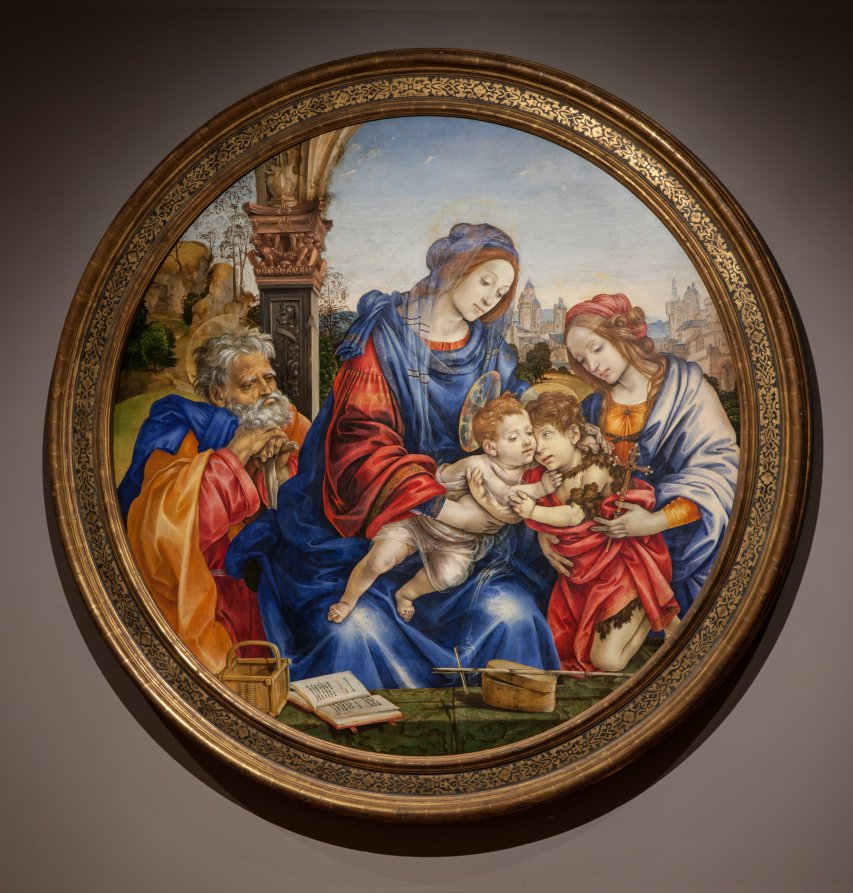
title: The Holy Family with Saint John the Baptist and Saint Margaret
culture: Italy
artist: Filippino Lippi (Italian, c. 1457–1504)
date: c. 1488–93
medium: tempera and oil on wood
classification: Painting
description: This monumental tondo, among Filippino’s most significant works, was commissioned by Neapolitan cardinal Oliviero Carafa, a leading political and ecclesiastical figure. The painter’s ingenious composition harmoniously overlaps five brilliantly colored divine figures within the challenging circular format. Behind a low wall adorned with sacred and domestic objects, Joseph observes the intertwined group of Mary holding Christ, who embraces his cousin John the Baptist, supported by Saint Margaret. Created during Filippino’s Roman years (1488–93), the painting reflects the inspiration he drew from ancient art. The preparatory drawing reveals how he reimagined Greco-Roman figures—his sketch of an antique Venus statue was refashioned into Saint Margaret—while the weathered pier references remnants of ancient architectural and decorative motifs, illustrating Filippino’s deep engagement with the fragments of antique murals, sculpture, and architecture throughout the city.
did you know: Ultramarine, the blue pigment used lavishly across this tondo (circular painting), was many times more expensive than gold in the Renaissance.